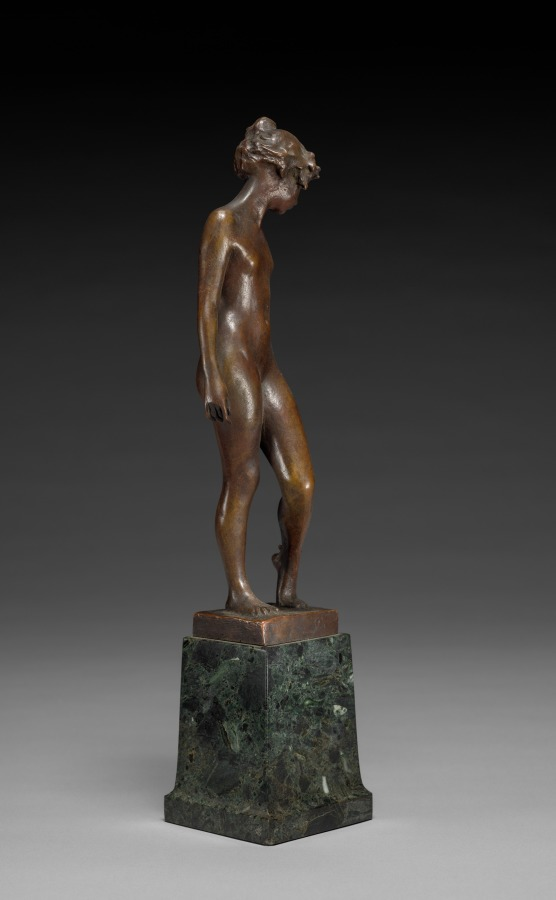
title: Butterfly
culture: America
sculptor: Emil Fuchs (American, born Austria, 1866–1929)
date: c. 1919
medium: bronze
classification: Sculpture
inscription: Signed on base: EMIL FUCHS